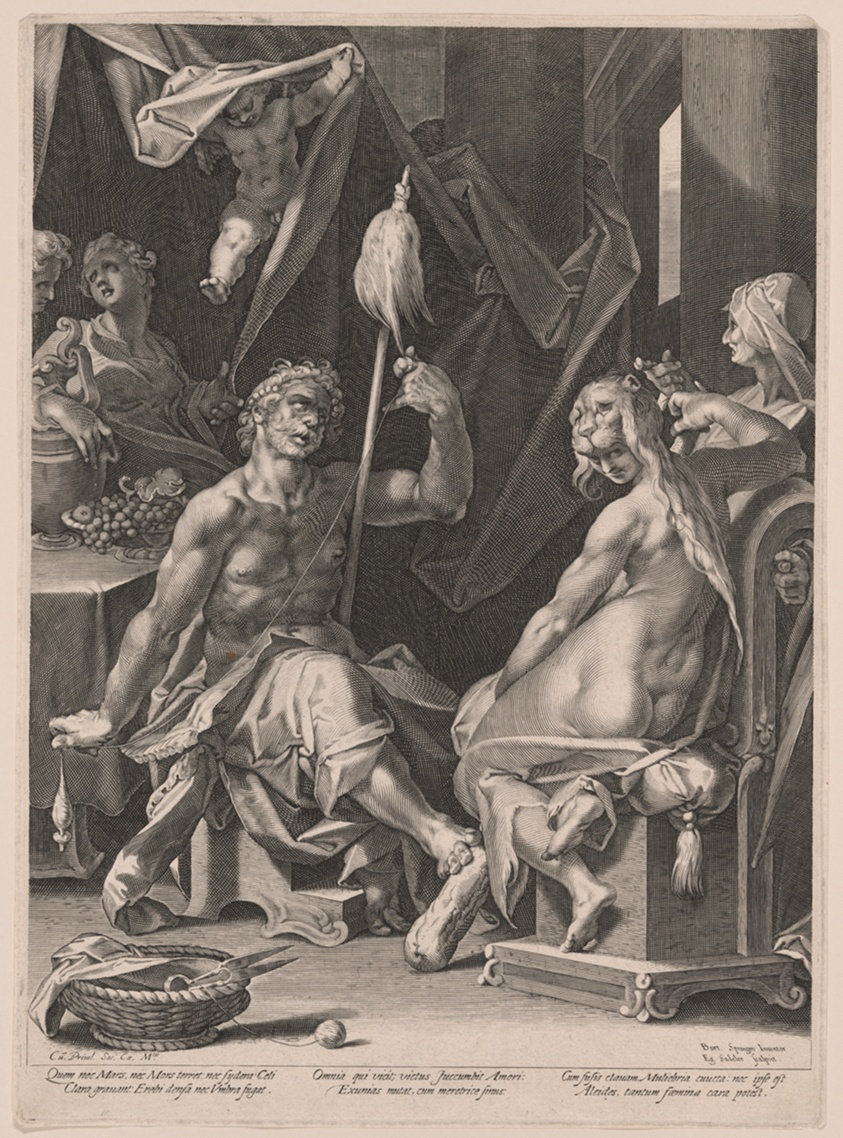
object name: Print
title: Hercules and Omphale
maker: Aegidius Sadeler, II (Flemish, c. 1570–1629); after Bartholomaeus Spranger (Flemish, 1546–1611)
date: c. 1600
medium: Engraving in black on ivory laid paper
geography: Flanders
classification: prints and drawing; paper; print; engraving